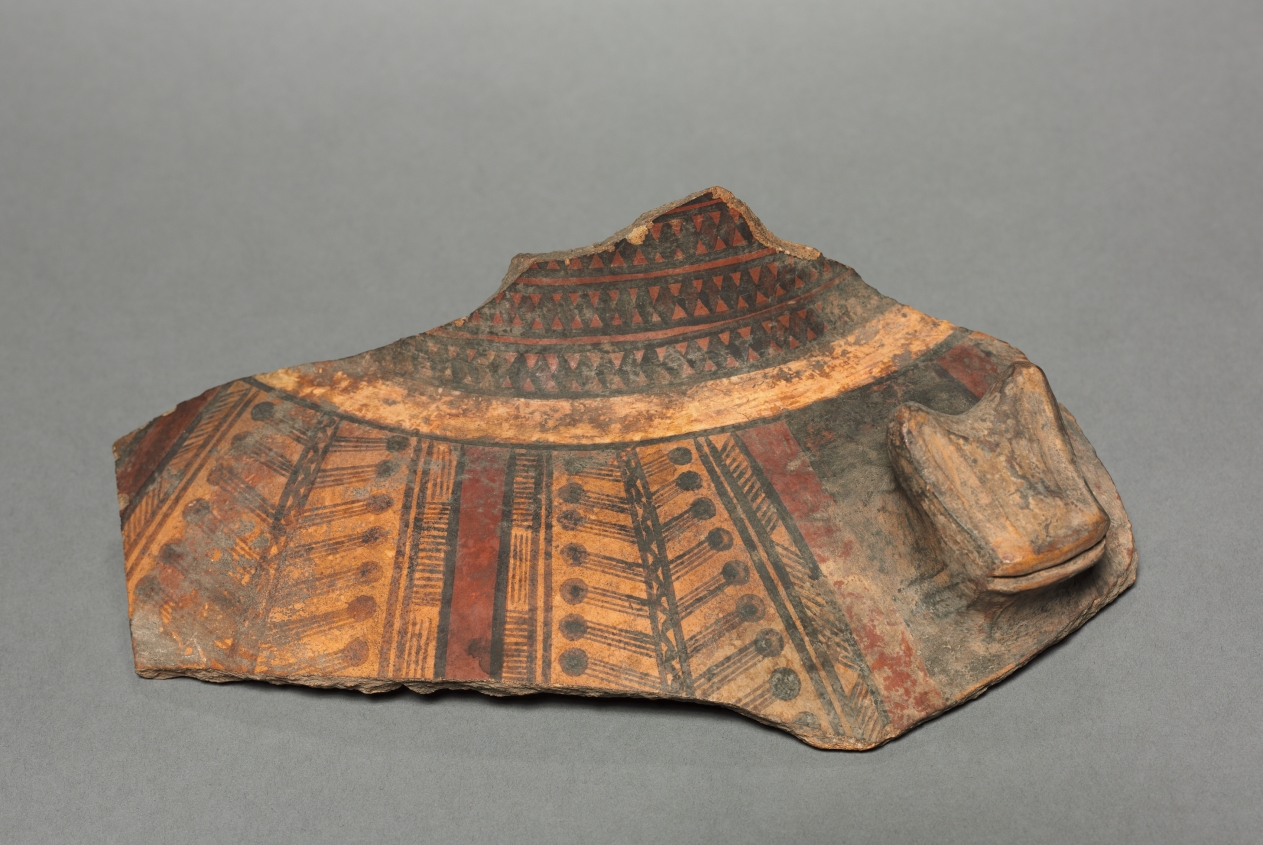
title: Fragment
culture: Peru, Inka, 1400-1532 AD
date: 1400–1532 AD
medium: pottery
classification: Ceramic